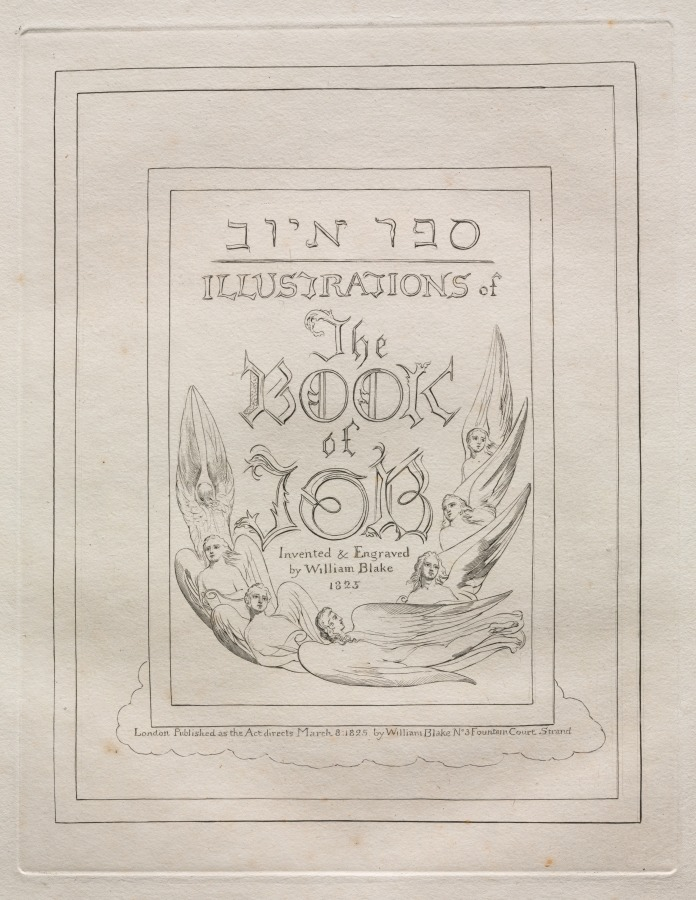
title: The Book of Job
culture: England, 18th century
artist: William Blake (British, 1757–1827)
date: 1825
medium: engraving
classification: Portfolio